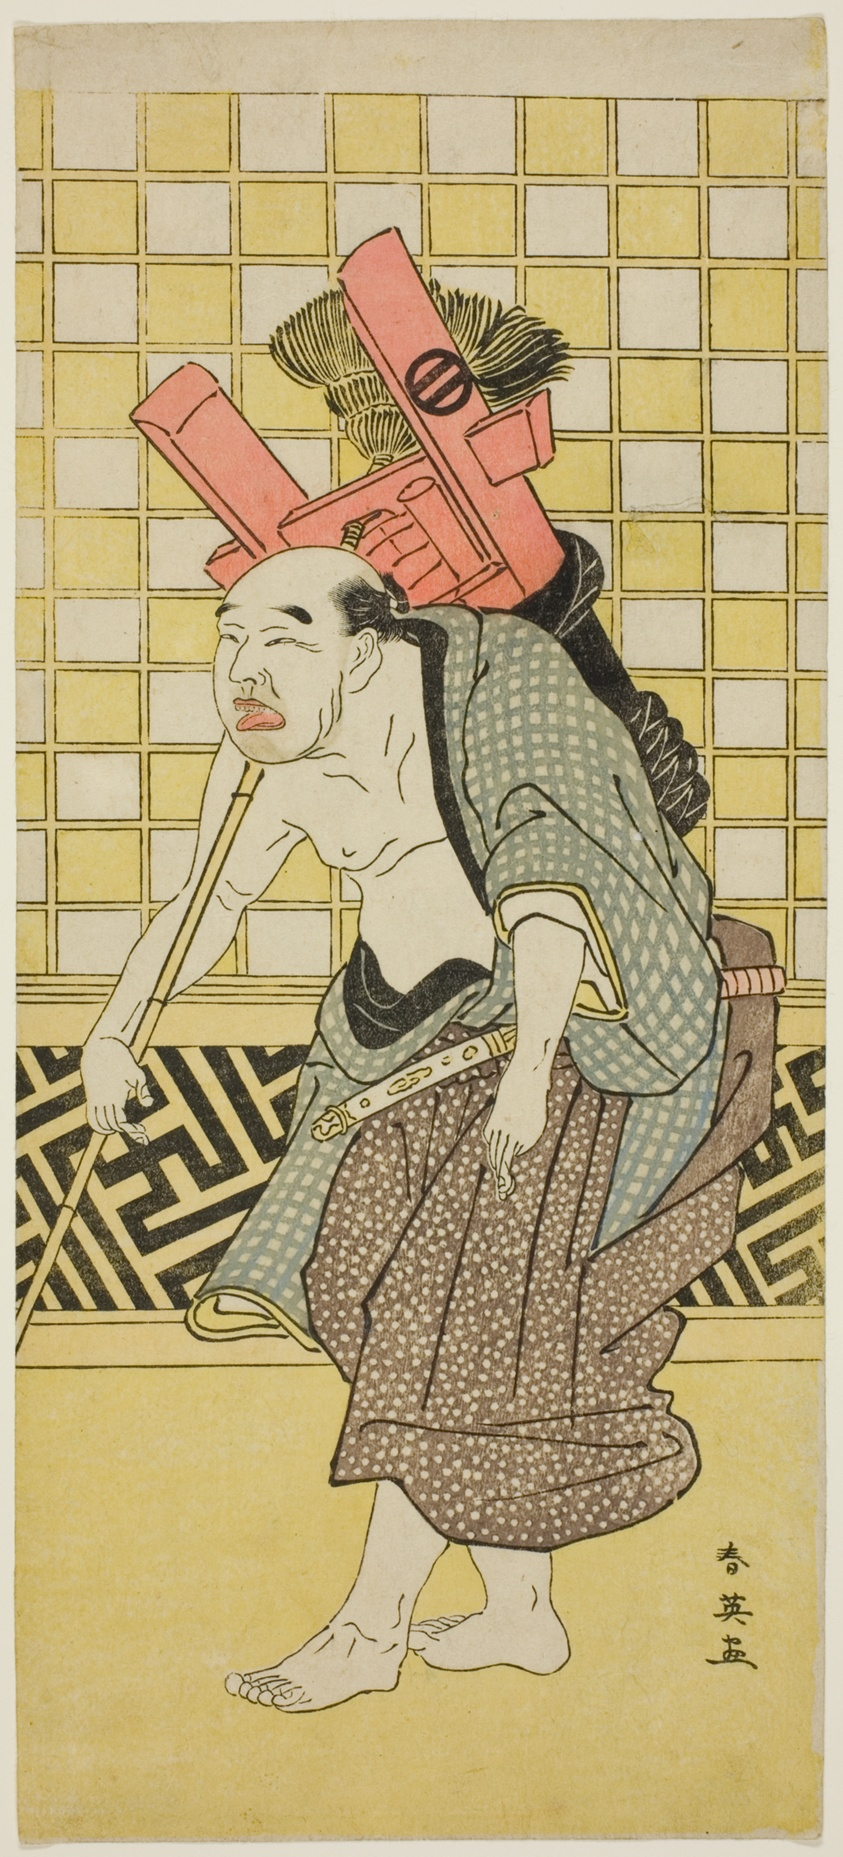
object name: Print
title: Actor Asao Tamejûrô I as Drunken Gotôbei in “Yoshitsune’s Koshigoe Petition” (“Yoshitsune Koshigoe jô”)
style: Japanese (culture or style)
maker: Katsukawa Shun’ei; Japanese, 1762–1819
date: About 1790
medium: Color woodblock print; hosoban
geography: Japan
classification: woodblock print; print; asian art